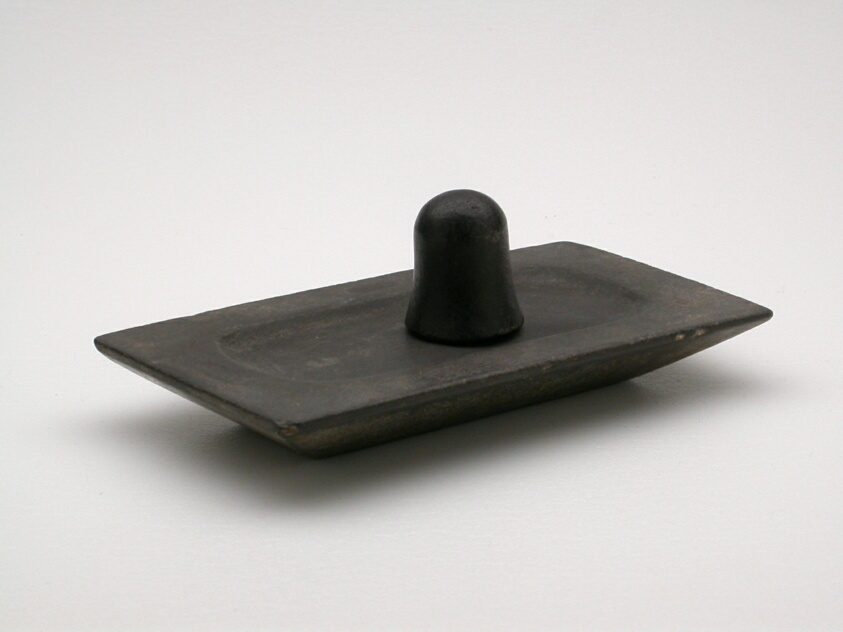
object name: Costume and Accessories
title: Mortar and Pestle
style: twelfth dynasty, middle kingdom, egyptian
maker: Egyptian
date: Middle Kingdom, Dynasty 12 (about 1985–1773 BCE)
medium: Mortar: baked steatite; pestle: granite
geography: Egypt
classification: mortar (grinding tool); stone; vessel; ancient art; costume